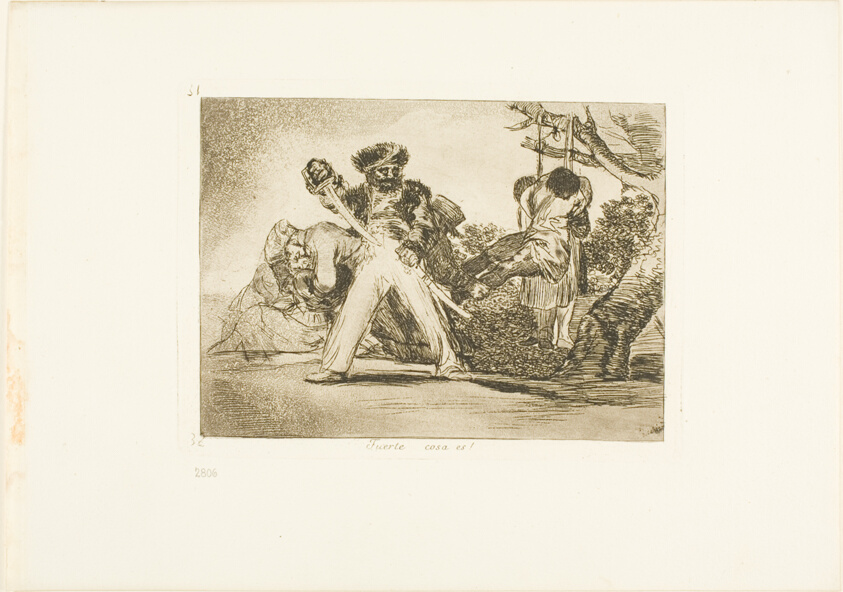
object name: Print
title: That's tough!, plate 31 from The Disasters of War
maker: Francisco José de Goya y Lucientes (Spanish, 1746-1828)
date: 1812/15, published 1863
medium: Etching, burnished aquatint and drypoint on ivory wove paper with gilt edges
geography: Spain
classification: etching; print; prints and drawing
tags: war